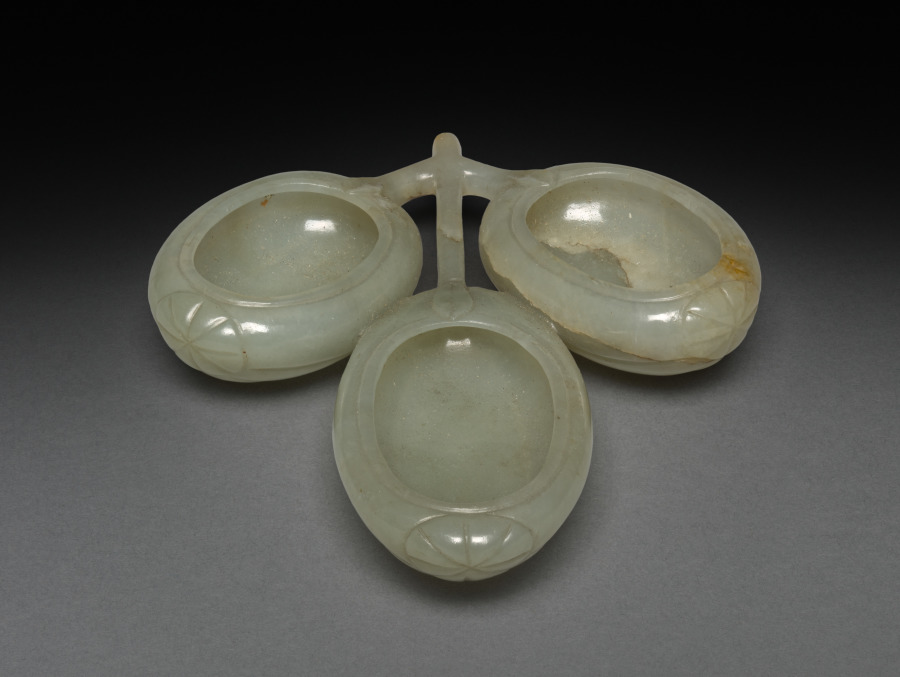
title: Three-Lobed Dish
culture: China, Qing dynasty (1644-1911)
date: 18th Century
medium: jade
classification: Jade